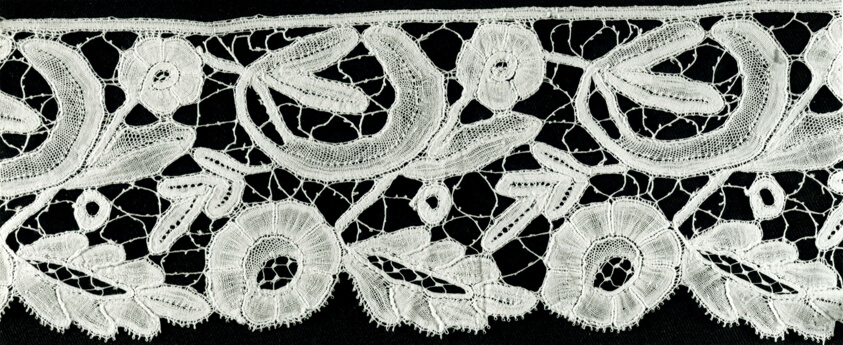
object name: Textile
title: Two Border Fragments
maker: Belgium, probably Bruges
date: 1880s/90s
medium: Cotton, bobbin part lace of a type known as "Duchesse de Bruges"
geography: Belgium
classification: textile; lace - bobbin